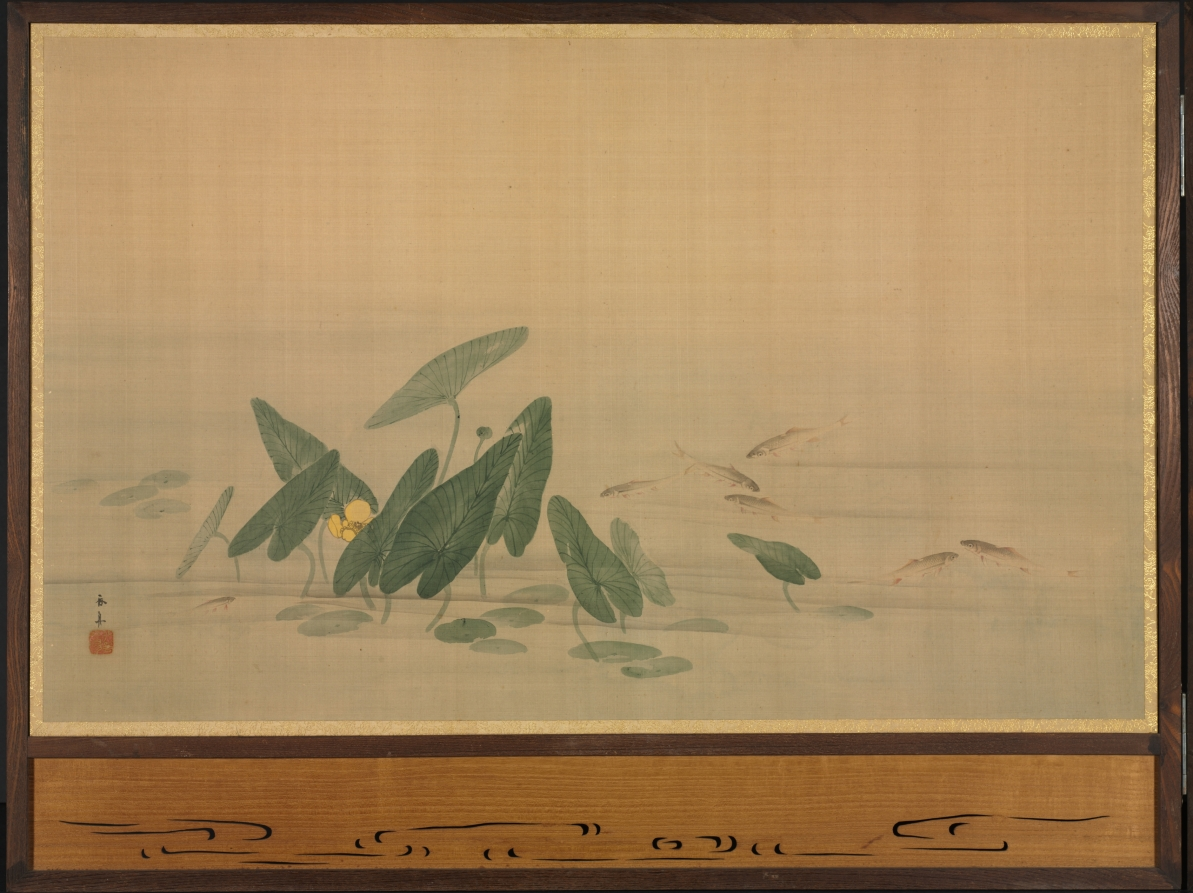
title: Fish in a Lotus Pond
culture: Japan, Edo period (1615–1868)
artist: Ōhara Donshū (Japanese, d. 1857)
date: 1800s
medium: two-fold screen; ink and color on silk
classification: Painting